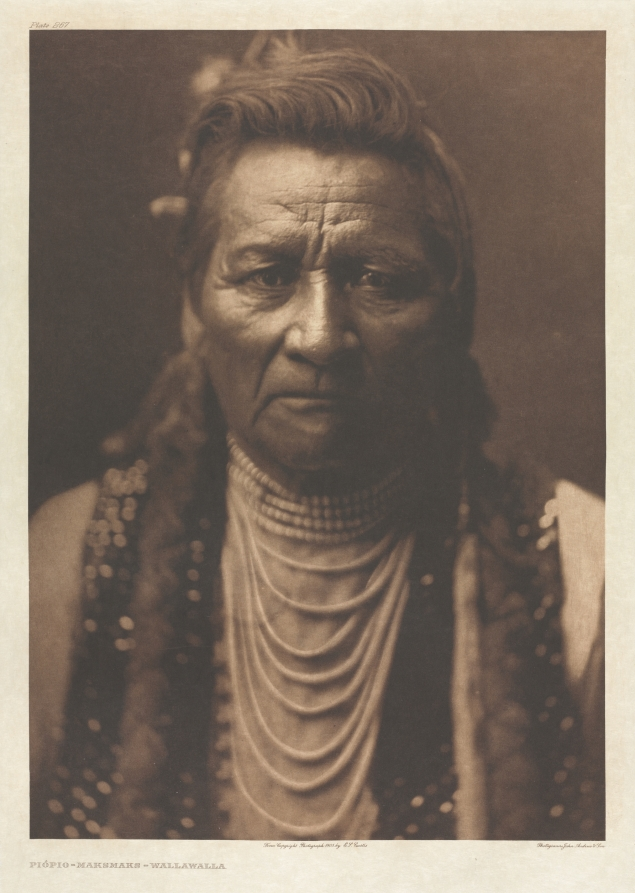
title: Portfolio VIII, Plate 267: Piópio-Maksmaks - Wallawalla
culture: America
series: The North American Indian: being a series of Portfolios picturing and describing the Indians of the United States, the Dominion of Canada, and Alaska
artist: Edward S. Curtis (American, 1868–1952)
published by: The University Press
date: 1905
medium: photogravure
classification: Portfolio